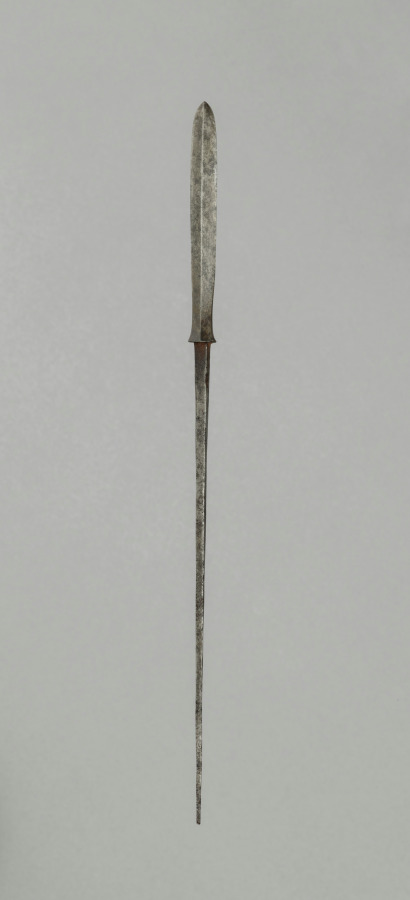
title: Arrow Point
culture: Japan, Edo period (1615–1868)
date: 1700s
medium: steel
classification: Arms and Armor